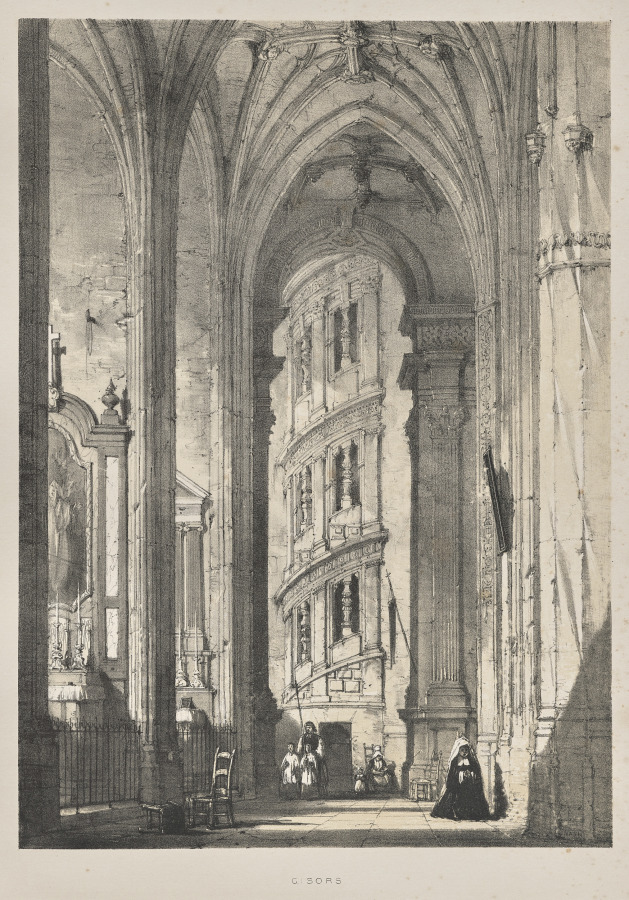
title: Architecture of the Middle Ages: Church of St. Gisors, Interior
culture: England, 19th century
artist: Joseph Nash (British, 1808–1878)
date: 1838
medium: lithograph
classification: Print